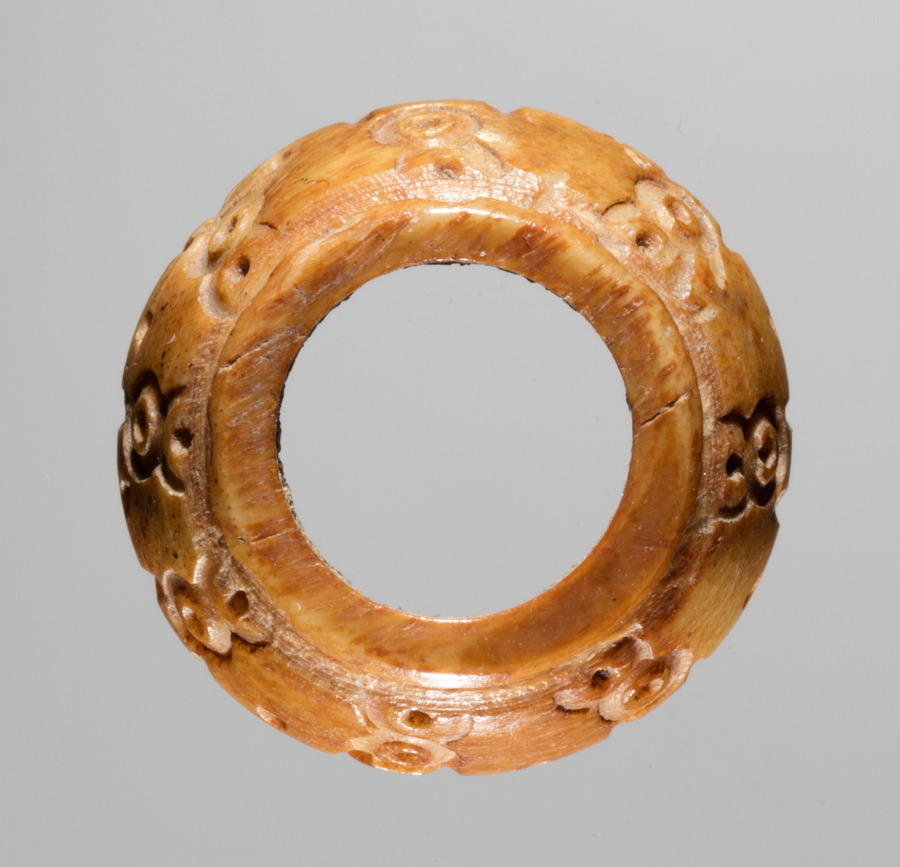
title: Spindle Whorl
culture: Iran, early Islamic period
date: 700s - 900s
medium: bone, incised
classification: Spindle Whorl